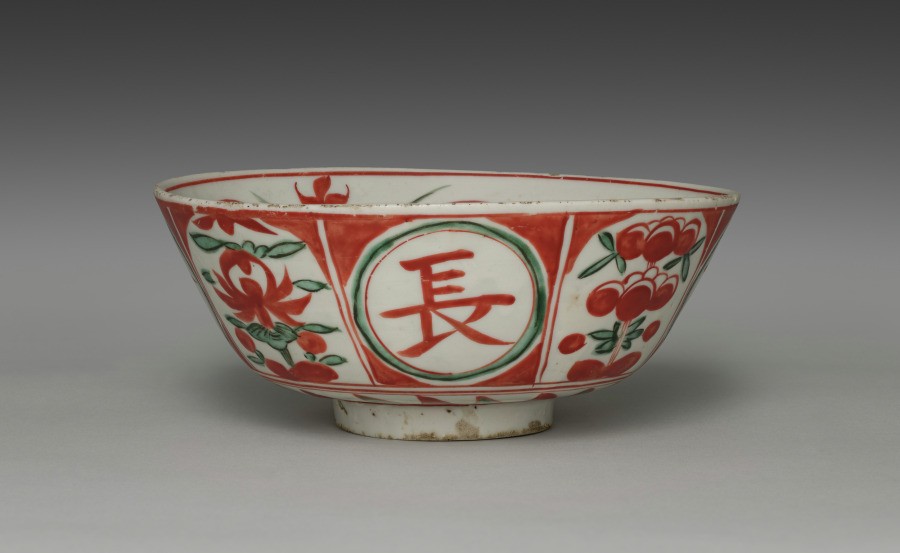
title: Bowl with Auspicious Ideographs and Floral Motifs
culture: China, Ming dynasty (1368–1644)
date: 1600s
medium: Stoneware with overglaze color enamels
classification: Ceramic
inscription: 長,命,富,貴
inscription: 【印】清風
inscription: 【印】大日本清風造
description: As part of their work, members of the Seifu studio, and Seifū Yohei III (三代清風与平, Japanese, 1851–1914), in particular, engaged in the viewing and appreciation of Chinese ceramics. While they were not authenticators, they would have been familiar with imported examples of Chinese stoneware and porcelain through tea gatherings, meetings with their elite clients, exhibitions, and other opportunities to see and study actual pieces from the mainland. This object and its box may be a reflection of Yohei III’s experiences of this kind. The bowl itself is slightly misshapen and roughly glazed with overglaze color enamels in red and green. Flanked by floral motifs, four Chinese characters brushed in red appear in roundels: 長命富貴. Meaning, respectively, longevity, life, prosperity, and status, they are pronounced together in Japanese as the phrase chōmeifūki, or “live long and prosper.” Additional loosely painted foliate designs in red and green circle the area above the foot and inside of the bowl. It is a relatively simple piece made by someone who was likely capable of much finer, more precise work but who could also do completely passable wares on short order. Of greater interest is the storage box lid for this piece. It has an inscription by Yohei III, with his seal, declaring it to be a “sweets dish from southern China with color images.” On the reverse of the lid, Yohei has written his name and placed his Imperial Household Artist seal, but instead of writing “made by,” he wrote “saw this [ceramic].” To the left of this is another inscription in a different hand, stating that the piece is a work from southern China with red-painted designs, produced at the very end of the Ming dynasty. It is signed “Kushi Takushin 久志卓真," along with his seal. Kushi Takushin (1898–1973) was a Japanese musician and music critic, as well as an antiques researcher and authenticator. He was especially interested in Ming dynasty Chinese ceramics and wrote extensively on Chinese, Japanese, and Korean ceramics. Originally from Hokkaido, he was active in Kyoto and began collecting art at a young age. Both he and Yohei appreciated and commented upon the bowl, and perhaps they both owned it.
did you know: Each roundel contains an auspicious word conveying good wishes for a long life and wealth.